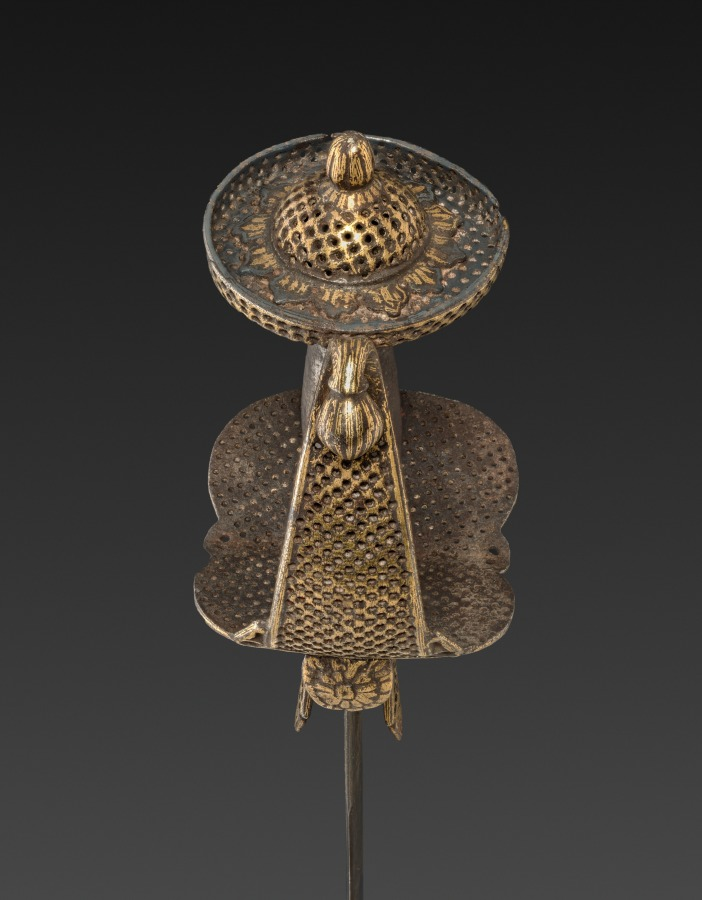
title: Tulwar sword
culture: India, probably Deccan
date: 1700s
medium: Iron hilt with gold; steel blade with gold; wood scabbard with velvet and metallic thread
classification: Arms and Armor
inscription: Help [comes] from God, and Victory is imminent.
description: This long curved sword and scabbard are of the kind used and worn by Mughal nobility, as seen often in paintings. The openwork hilt is a characteristic of swords from the southern Indian region known as the Deccan. By the end of the 1500s, the Mughals began making regular incursions into the Deccan as they attempted to expand their empire, increasing the exchange of art forms. Repeated four times, twice on one side of the blade and twice on the other in gold inlay, is the same line from the Qur'an 61:13: “Help [comes] from God, and Victory is imminent.” This is a popular inscription on daggers, banners, and other instruments of war, as it reassures the combatants that God is on their side, and therefore they can in good faith expect a speedy victory if they fight valiantly.